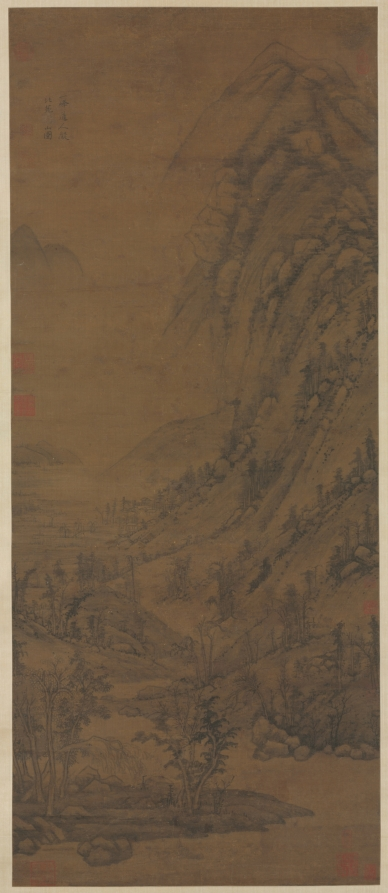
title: Summer Mountains (after Dong Yuan [active c. 937–75])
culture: China, Yuan dynasty (1271-1368)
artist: attributed to Huang Gongwang (Chinese, 1269–1354)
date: 1290–1354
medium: hanging scroll; ink and slight color on silk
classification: Painting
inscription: 【印】一峰道人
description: This monumental landscape is drawn in softly rounded strokes with darker lines frequently applied on top of lighter ones. This technique recalls one of the suggestions included in a collection of the artist's writings known as Secrets of Landscape Painting: The most difficult thing in painting is using the ink. The artist begins by using dilute ink and builds it up to the point where it begins to look right, then uses dense, black ink, applied fairly dry, and washes of deeper-toned ink. This technique distinguishes the fields from the paths, the far from the near. Huang Gongwang may have learned this technique from observing nature through the eyes of an earlier master, Dong Yuan, a painter whose style he shared.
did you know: The wet hills and moist, rich atmosphere evoke the southern Chinese summer, characterized by monsoon rains and lush growth.